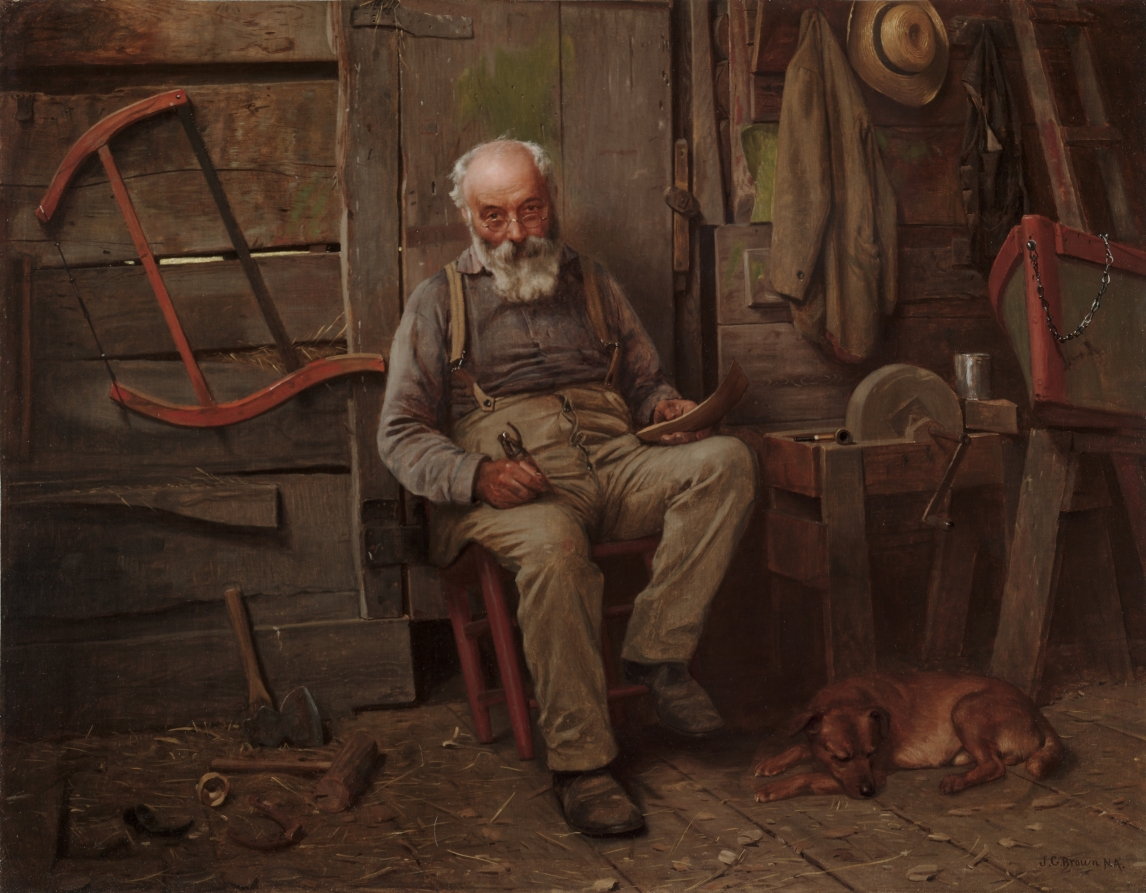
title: A Builder of Boats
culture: America, late 19th-early 20th Century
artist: John George Brown (American, born England, 1831–1913)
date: c. 1904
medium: oil on canvas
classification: Painting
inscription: signed lower right: J.G. Brown N.A.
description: Brown's preference for rural subjects in a time when the United States was undergoing rapid industrialization suggests nostalgia for the past. Indeed, A Builder of Boats, an image of an elderly craftsman working alone with hand tools in a tranquil setting replete with his sleeping dog, offered its contemporary audience a distinct alternative to mechanized factory production.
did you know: The object held in the sitter’s right hand is a drawing compass.